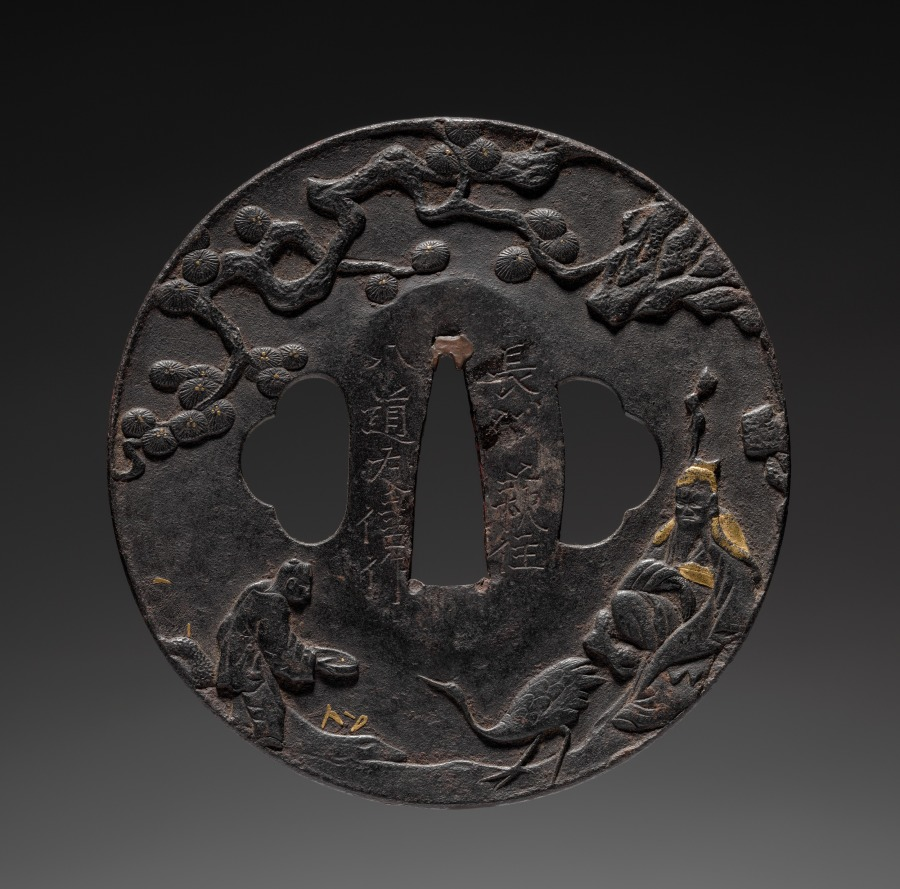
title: Sword Guard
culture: Japan, Edo period (1615–1868)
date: mid-1700s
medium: iron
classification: Arms and Armor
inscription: signed: 長州萩住八道友信作